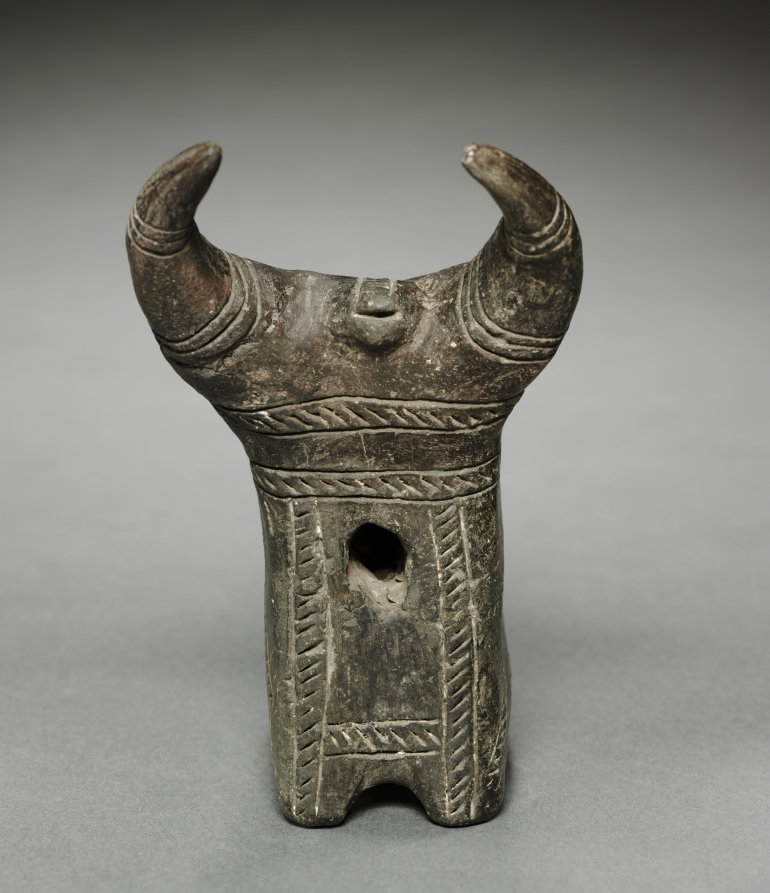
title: Bull Protome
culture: Cyprus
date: 2000–1000 BCE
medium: terracotta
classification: Ceramic